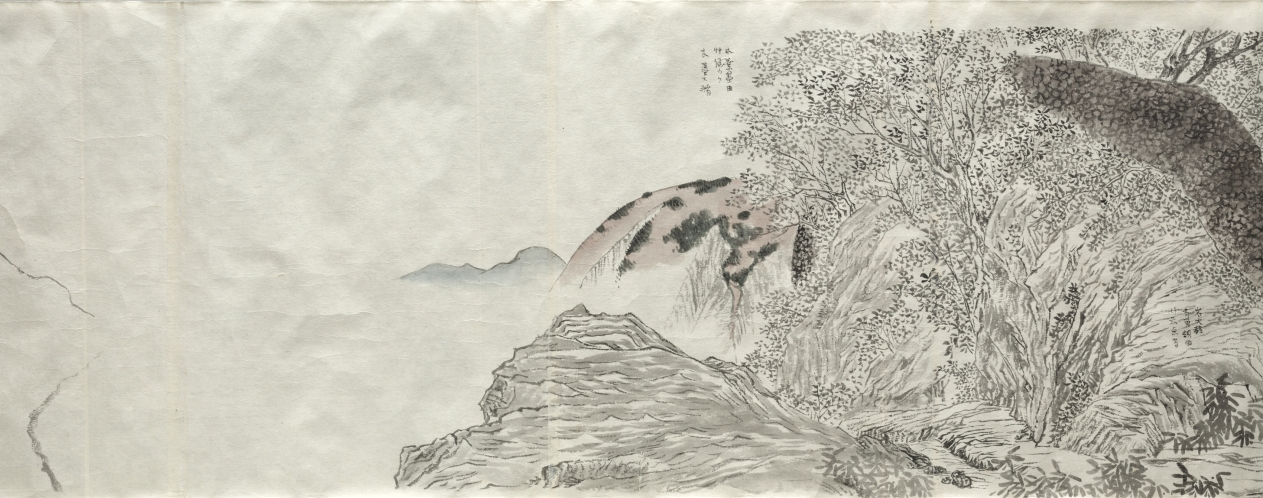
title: Sketch Copy of Natural Disasters, from the Seven Fortunes and Misfortunes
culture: Japan, Edo period (1615–1868) to Meiji period (1868–1912)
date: after 1773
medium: handscroll; ink and color on paper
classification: Painting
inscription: Signed: Gettcho; dated 1773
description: This unmounted handscroll is a copy of the first of a three-scroll set painted by Maruyama Ōkyo (1733–1795) for Buddhist monk Yujō (1723–1773). It depicts people's unfortunate encounters with forces of nature from wind to beasts. Ōkyo's realistic, contemporary imagery was meant to evoke a sense of recognition and empathy in viewers, shocking them into avoidance of possible punishments.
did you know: Notations that appear throughout the scroll indicate colors and other details of the original painting.